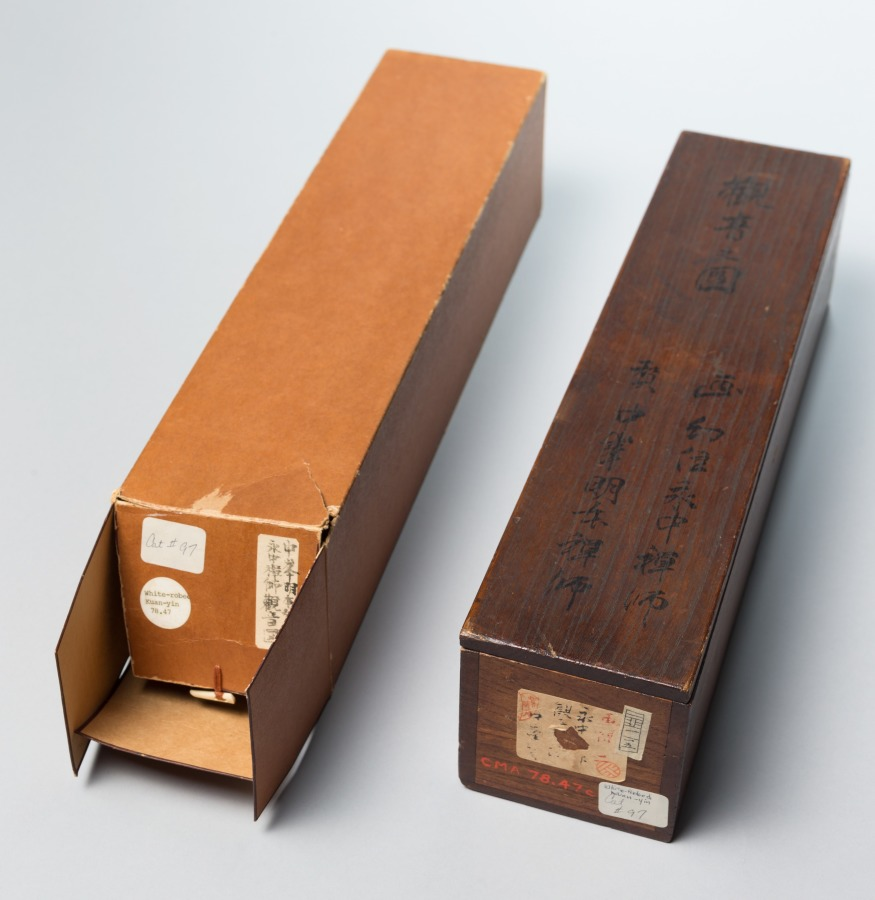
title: White-Robed Guanyin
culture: China, Yuan dynasty (1271-1368)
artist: Jueji Yongzhong (Chinese, active around 1300)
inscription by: Zhongfeng Mingben (Chinese, 1263–1323)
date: late 1200s–early 1300s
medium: hanging scroll; ink on paper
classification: Painting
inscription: Artist's signature: Huanzhu Yongzhong. Inscription by Zhongfeng Mingben: The right thinking [Samkalpa] is embodied within His deep meditation on the Buddha [naga-samadhi]. Retaining not even one single object of thought, A perfect harmony was wonderfully achieved. In the endless time and space, His all-embracing compassion prevails. [signed] Mingben of Huanzhu paying his respects.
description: Guanyin, the bodhisattva of infinite compassion (Avalokiteshvara, in Sanskrit), reveals himself in many forms. According to Buddhist belief, one such manifestation is the white-robed Guanyin sitting on a rock on the island of Putuo (Potalaka, in Sanskrit), located along the coast not far from Ningbo, in Zhejiang Province, China. Here, the figure was swiftly drawn in only a few ink lines. The inscription above is by Zhongfeng Mingben, perhaps the most widely respected and influential Chan (Zen in Japanese) master in the Yuan dynasty. The artist’s signature is a single line below on the left: Huanzhu Yongzhong.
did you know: The CMA collection includes a drawing by a Japanese priest, CMA 1978.47.2, inspired by this composition.